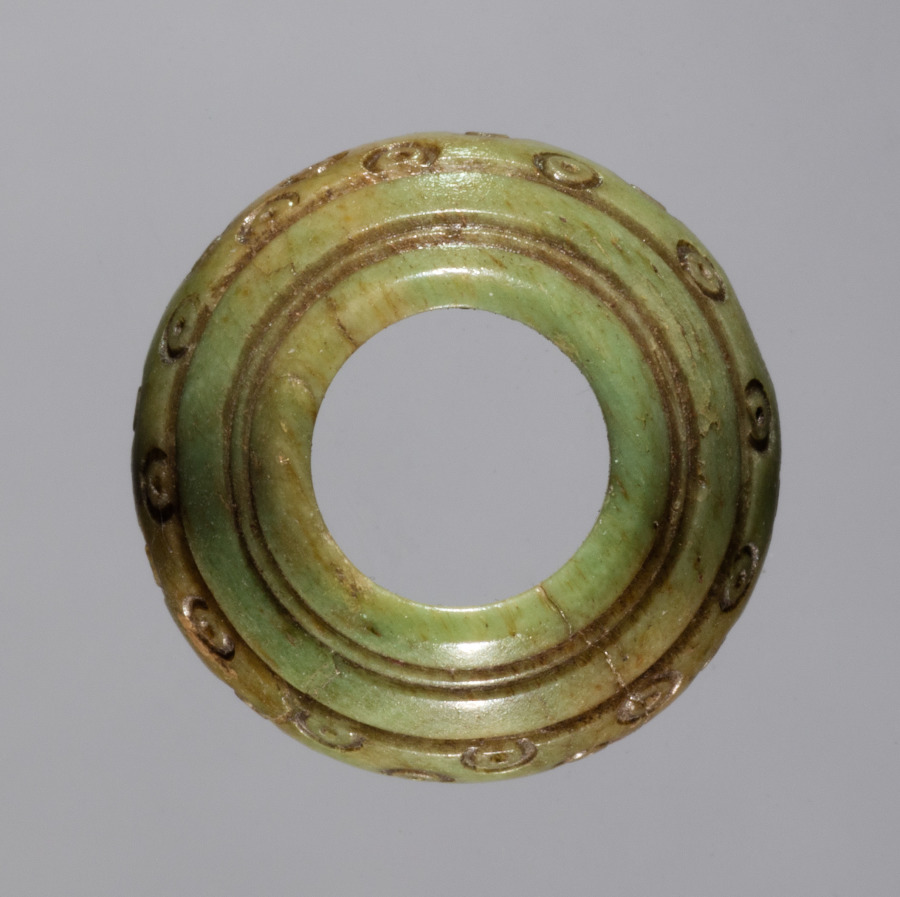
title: Spindle Whorl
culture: Iran, early Islamic period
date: 700s - 900s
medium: bone, incised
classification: Spindle Whorl